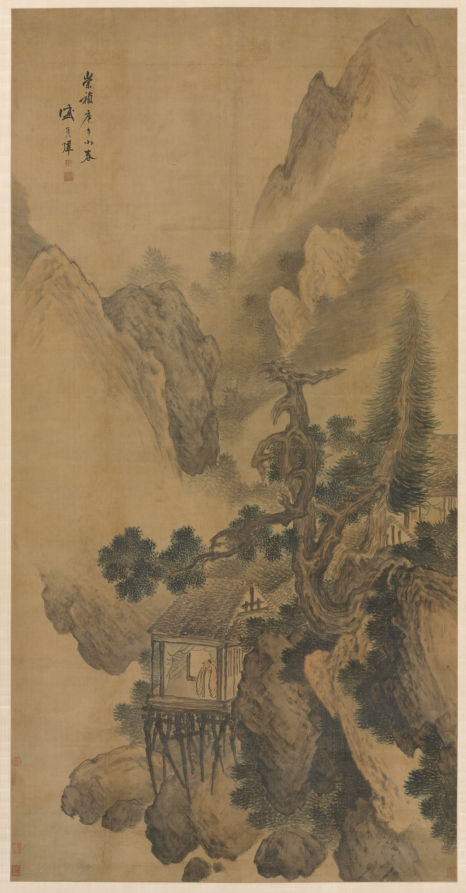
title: Lonely Retreat Overlooking a Misty Valley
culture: China, Ming dynasty (1368–1644)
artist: Sheng Maoye (Chinese, active early 1600s)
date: 1630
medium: hanging scroll; ink and slight color on silk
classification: Painting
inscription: Artist's inscription, signature, and 2 seals: In the tenth month of the gengwu year of the Chongzhen era [1630]. Sheng Maoye [seals] Sheng yin Maoye; Yuhua shi.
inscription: 4 additional seals of Liu Shu (1759–1816)